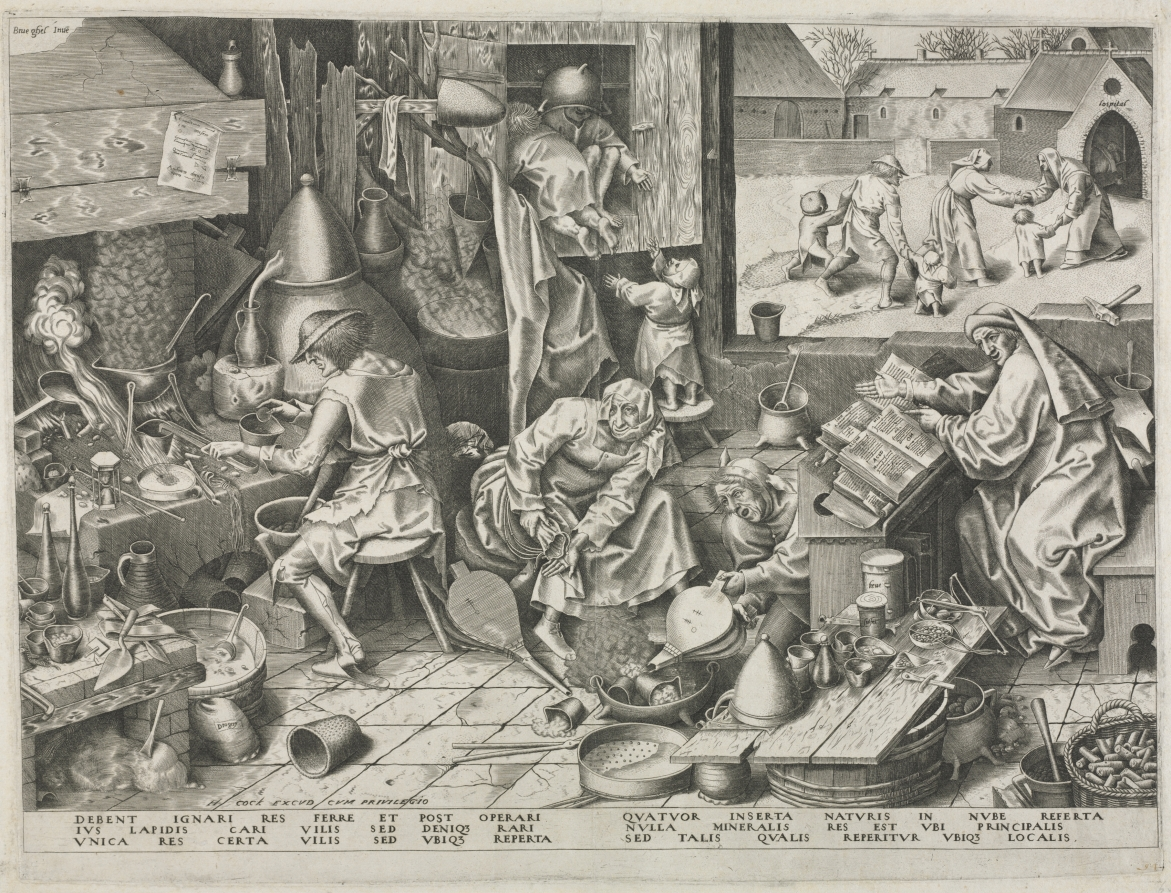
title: Alchemist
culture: Netherlands, 16th century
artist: Philip Galle (Flemish, 1537–1612)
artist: after Pieter Bruegel (Netherlandish, c. 1525/30–1569)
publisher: Hieronymus Cock (Netherlandish, 1500–1570)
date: 1558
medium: engraving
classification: Print